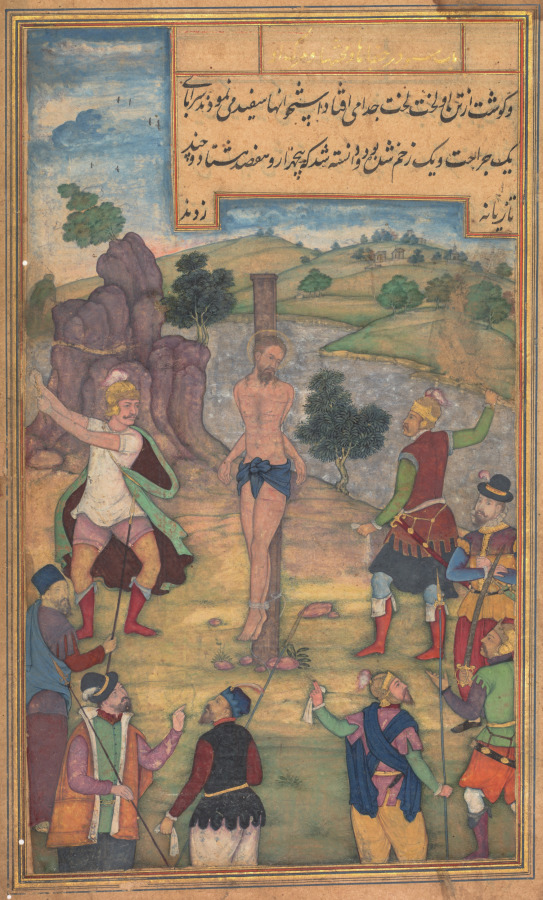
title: The Flagellation (folio 182 recto), from a Mirror of Holiness (Mir’at al-quds) of Father Jerome Xavier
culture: Mughal India, Allahabad, made for Prince Salim (1569–1627)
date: 1602–4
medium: Gum tempera, ink, color, and gold on paper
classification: Manuscript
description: Two Romans flog Jesus, who has been bound to a stake at the center of the circular composition made up of soldiers and the hilly horizon. His subtly articulated expression conveys both pain and compassion, as he endures cuts to his flesh and the bindings around his elbows that secure him so tightly to the post that his feet are elevated off the ground. This is the last illustration in the Cleveland manuscript of the Mirror of Holiness. The Crucifixion was never illustrated, possibly because the patron, Prince Salim, was Muslim. According to the Koran, Jesus did not die on the cross, but was absorbed into heaven by Allah.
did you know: A halo encircles Jesus’s head, and his hair and beard are highlighted with gold.